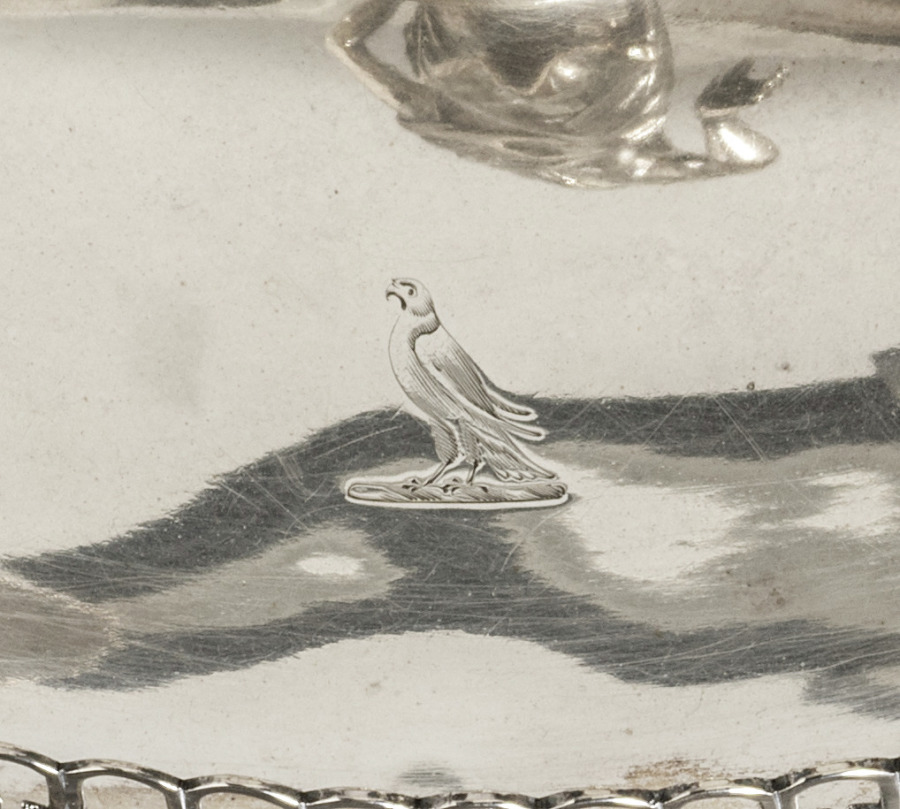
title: Centerpiece (metal stand)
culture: England, 18th century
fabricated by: William Pitts (British)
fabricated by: Joseph Preedy (British)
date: 1792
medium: silver and glass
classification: Silver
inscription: engraved: arms and crest of Bell Coat of arms with Bell impaling Brandling on flat platform.